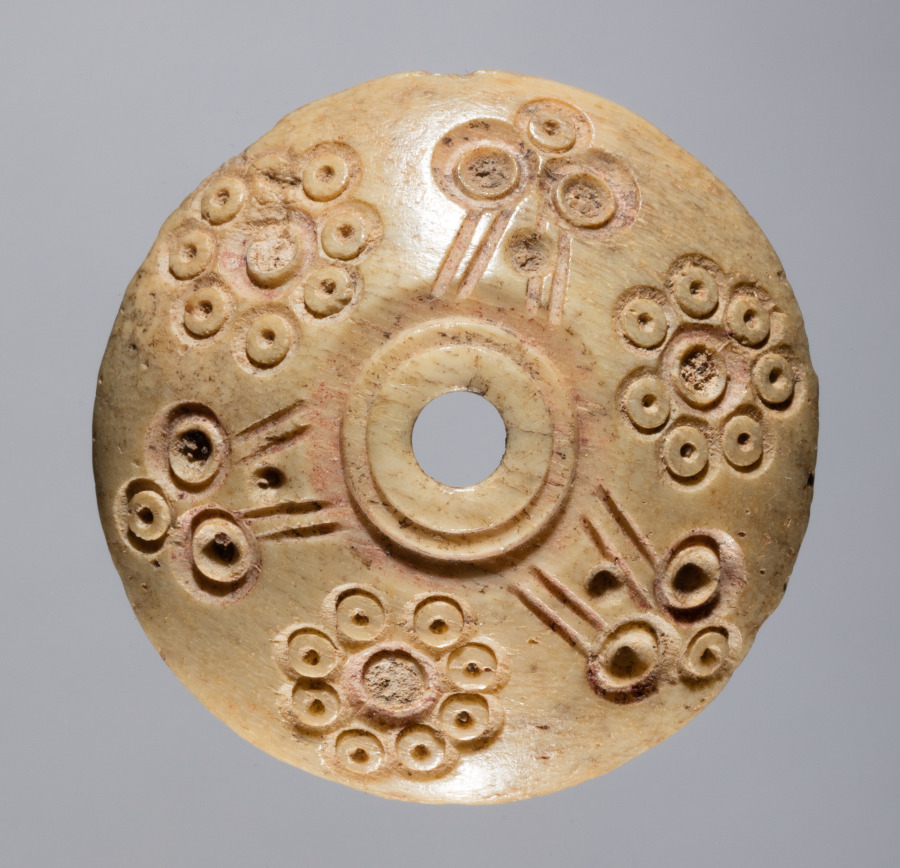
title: Spindle Whorl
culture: Iran, early Islamic period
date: 700s - 900s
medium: bone, incised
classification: Spindle Whorl